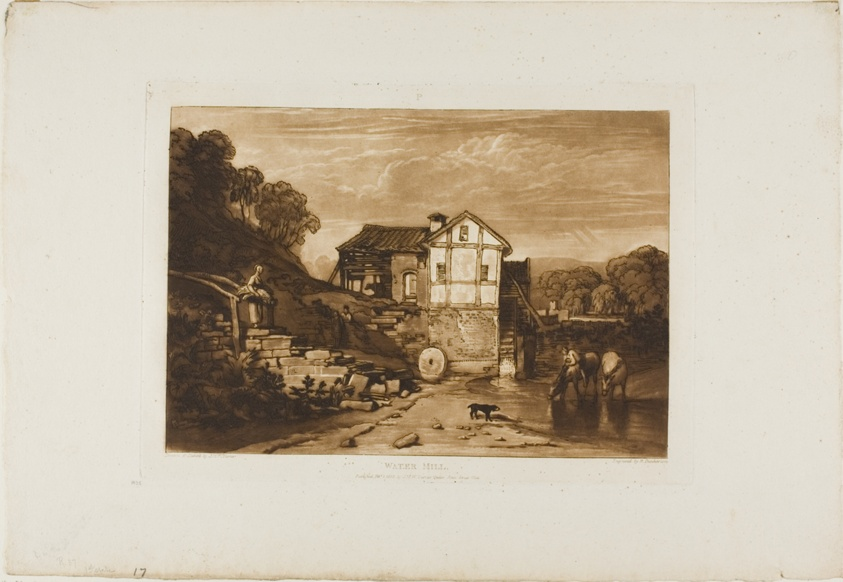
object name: Print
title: Water Mill, plate 37 from Liber Studiorum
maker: Joseph Mallord William Turner (English, 1775-1851)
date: Published February 1, 1812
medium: Etching and engraving in brown on ivory wove paper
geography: England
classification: etching; print; prints and drawing